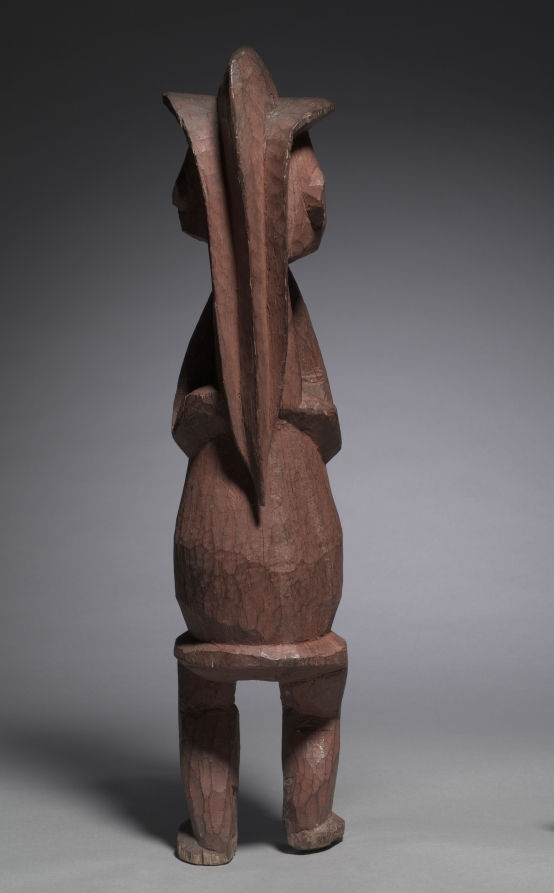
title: Male Figure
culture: Africa, Central Africa, Democratic Republic of Congo, Hungaan-style maker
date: mid- to late 1800s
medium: Wood and colorant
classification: Sculpture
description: Hungaan figures of this size served as guardians of ritual shrines and functioned in rituals to promote fertility, guarantee well-being, and ensure longevity. The striking crested hairstyle imitates a real coiffure or a wig, indicative of status and prestige. The hands supporting the chin identify the figure as a chief who is immersed in thought and contemplation, pondering over his responsibilities.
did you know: The red powdery surface of this figure mimics a red body adornment that mixed ground camwood with palm oil.